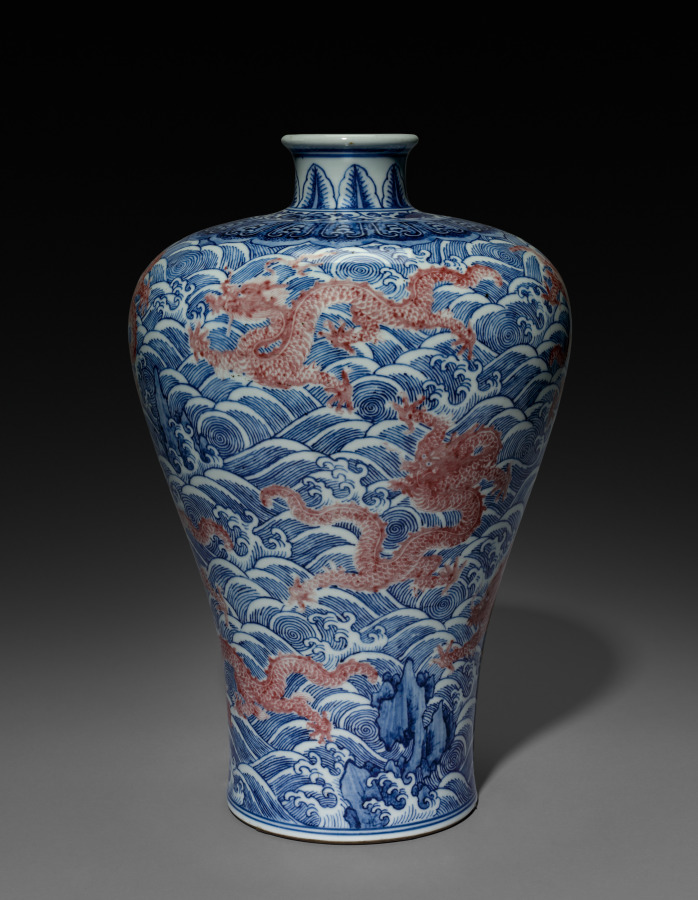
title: Bottle Vase with Dragons and Waves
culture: China, Jiangxi province, Jingdezhen kilns, Qing dynasty (1644-1911), Qianlong mark and reign (1736-95)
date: 1736–95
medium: Porcelain decorated in underglaze cobalt blue and copper red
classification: Ceramic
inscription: 大清乾隆年制